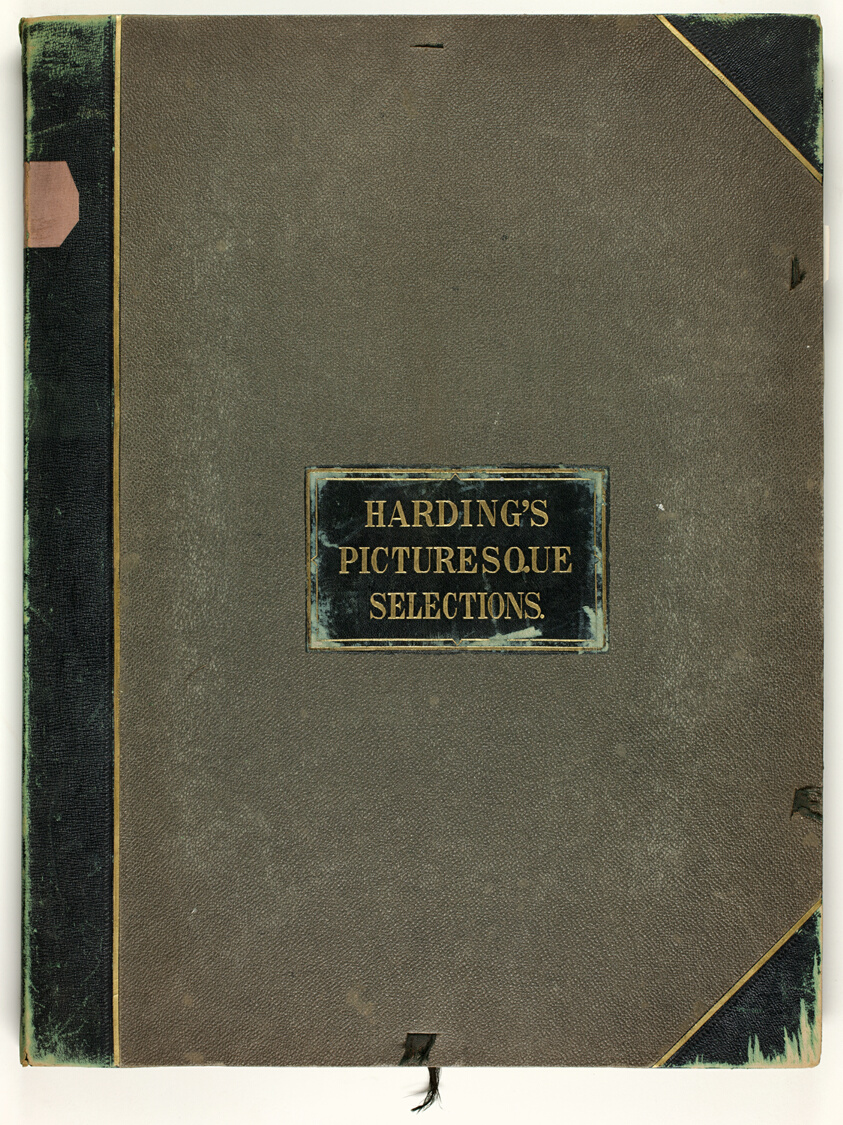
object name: Print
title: Picturesque Selections: Cover, from Picturesque Selections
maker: James Duffield Harding, (English, 1798-1863); Published by W. Kent and Co.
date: c. 1860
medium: Portfolio cover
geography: England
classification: portfolio cover; lithograph; portfolio; prints and drawing; print